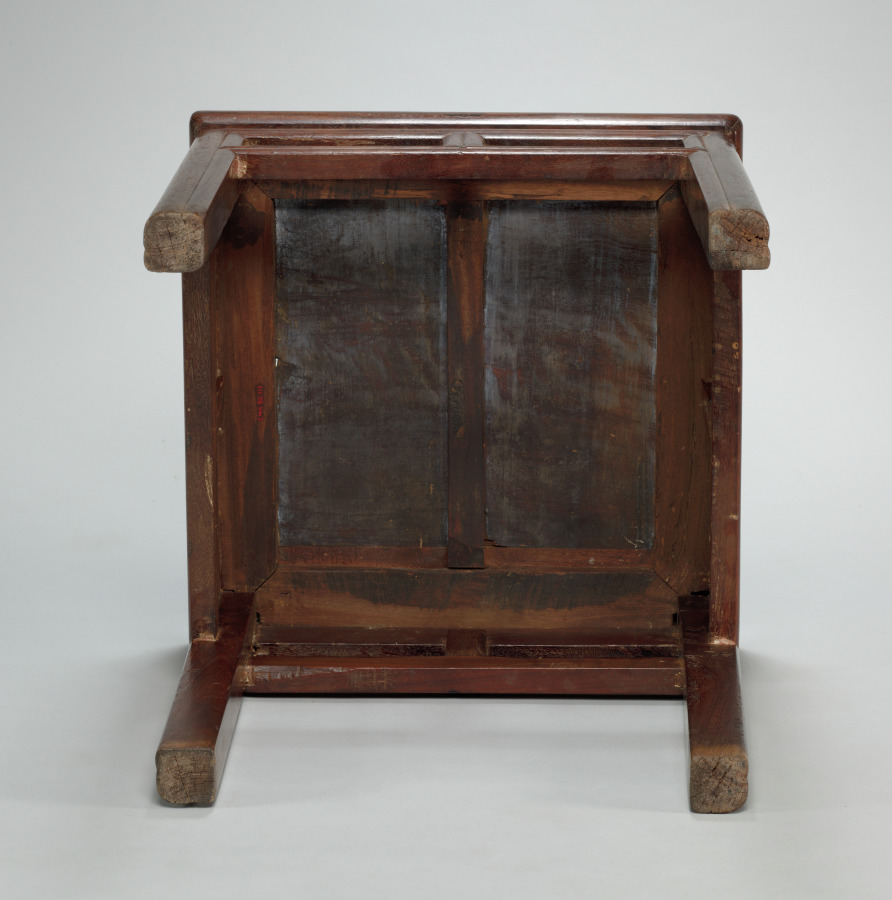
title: Stool (2 of 2)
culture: China, Qing dynasty (1644-1911)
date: 1700–1725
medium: Chicken-wing wood (jichimu)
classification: Furniture and woodwork